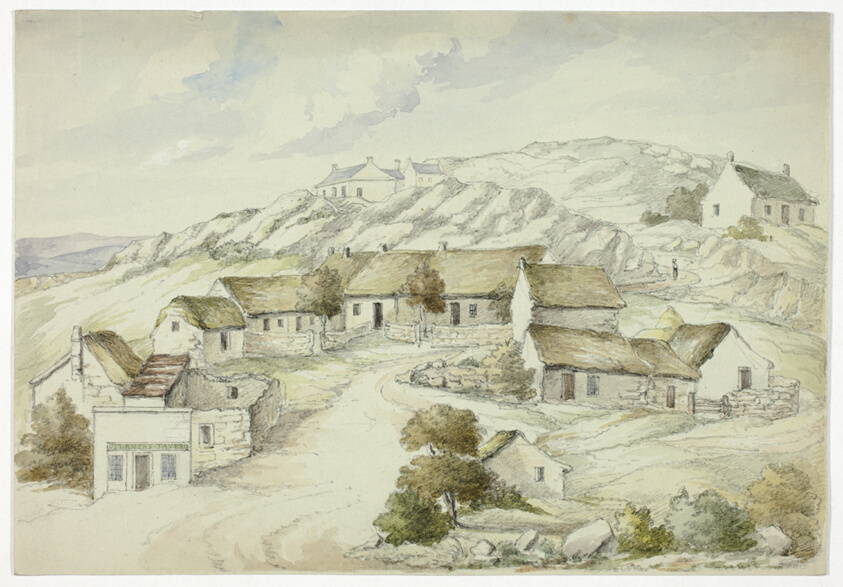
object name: Drawing and Watercolor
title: Kilkenny Village from the Rocks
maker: Elizabeth Murray (English, c. 1815-1882)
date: November 1843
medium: Watercolor with traces of white gouache over graphite on gray wove paper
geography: England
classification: watercolor; drawings (visual works); prints and drawing